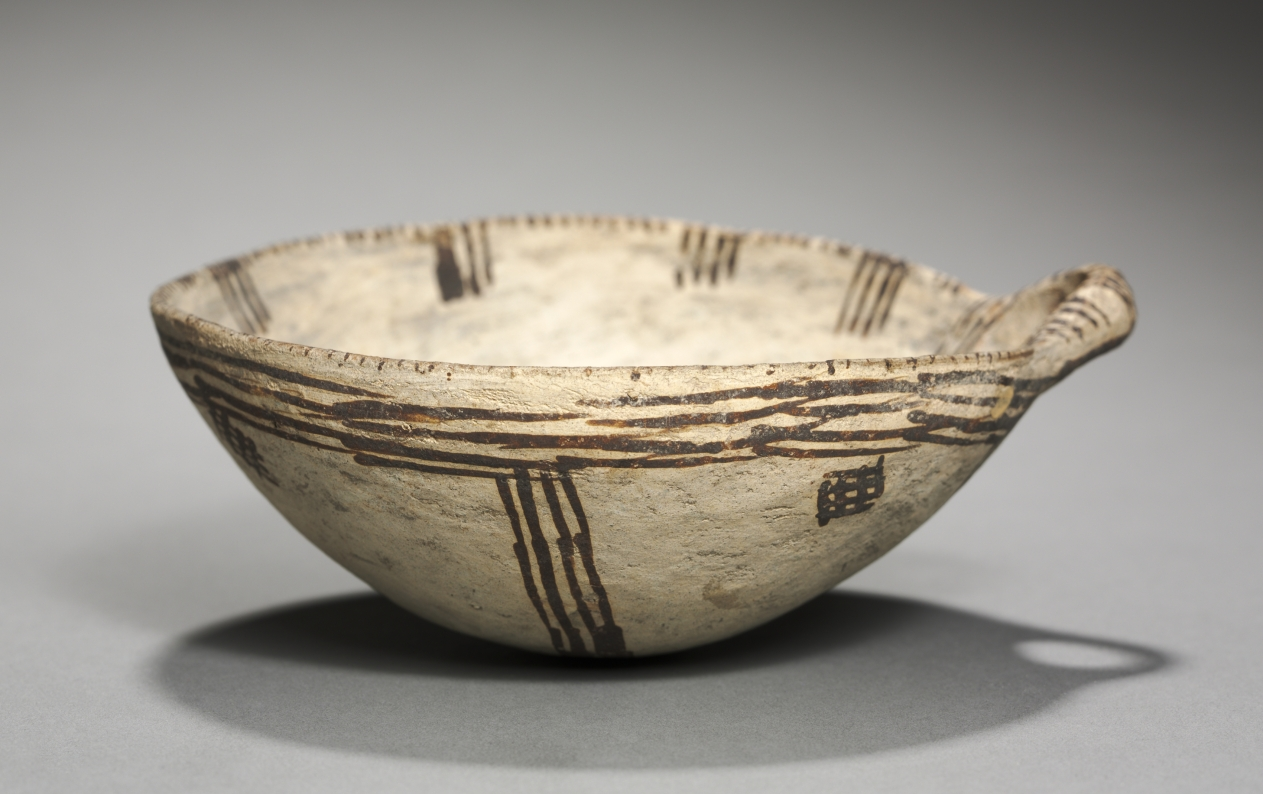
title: One-Handled Bowl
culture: Cyprus, late Cypriot II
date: c. 1450–1200 BCE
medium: white slip ware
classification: Ceramic